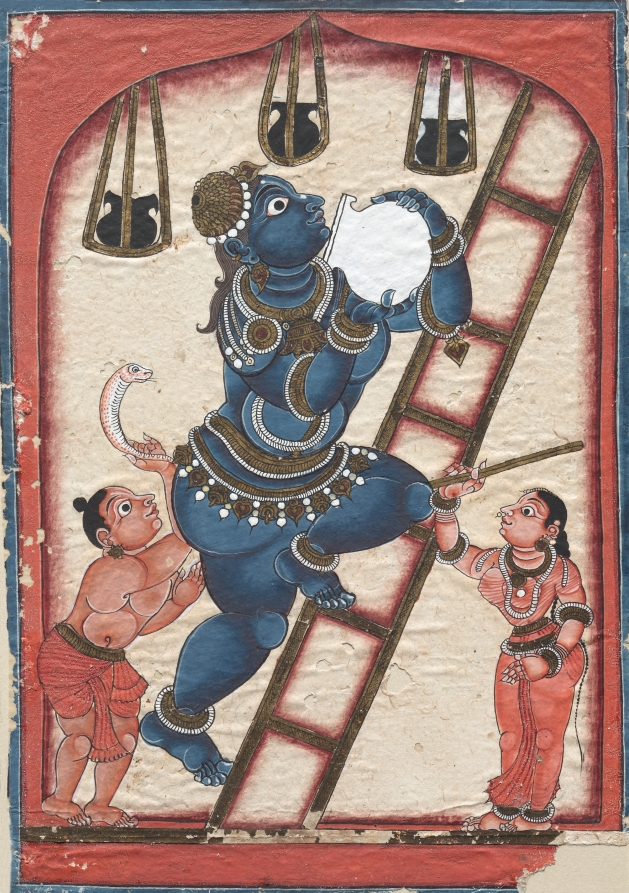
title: Krishna Stealing Curds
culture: Southern India, Andhra Pradesh, Tirupati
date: late 1700s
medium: gum tempera and gold on paper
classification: Painting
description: As a toddler growing up in a rural cowherding community, Krishna loved to eat the dairy products his parents attempted to keep out of his reach. With bold rounded contours and modeling, the blue-skinned Krishna totters precariously on a ladder, while his irate foster mother brandishes a stick at him.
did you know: Krishna’s brother Balarama holds a snake, since he is an incarnation of Vishnu’s cosmic serpent.